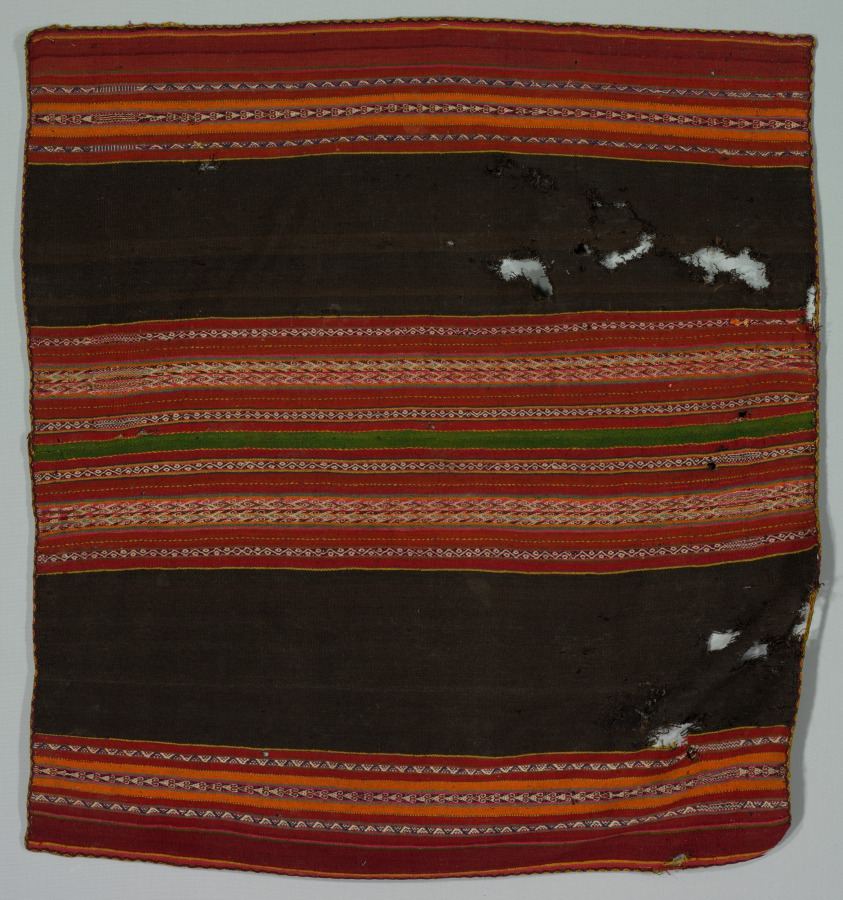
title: Warp Patterned Cloth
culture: Bolivia, Salinas, late 19th century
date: late 1800s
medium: wool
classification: Textile